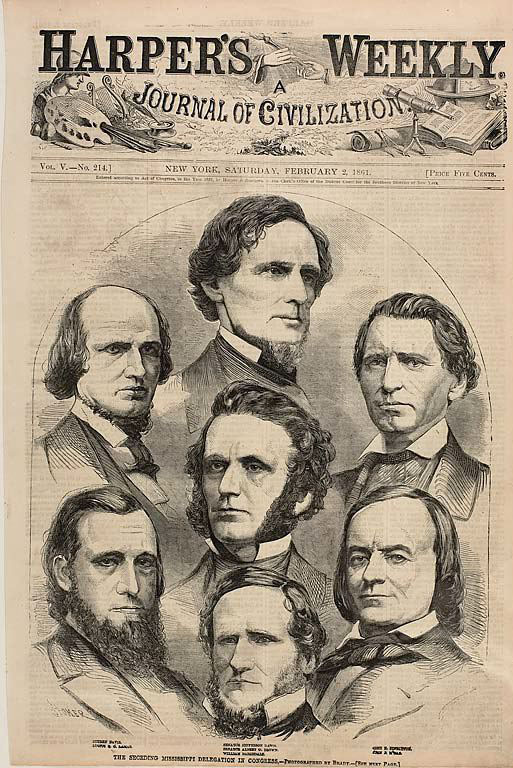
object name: Print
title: The Seceding Mississippi Delegation in Congress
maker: Winslow Homer (American, 1836-1910); after Mathew B. Brady (American, 1823-1896); published by Harper's Weekly (American, 1857-1916)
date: published February 2, 1861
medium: Wood engraving on paper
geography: United States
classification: wood engraving; print; prints and drawing